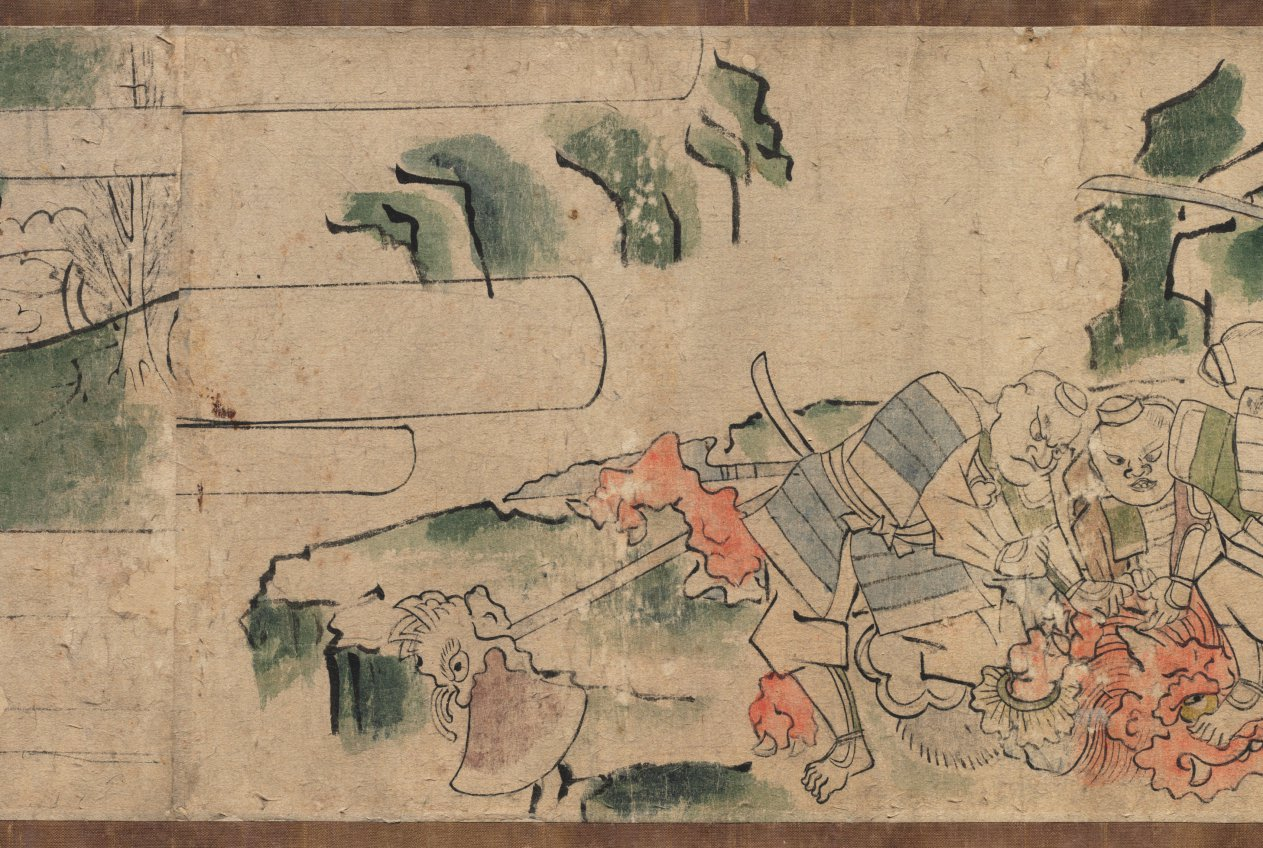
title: Oeyama Engi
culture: Japan, Edo period (1615–1868)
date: 1615–1868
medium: one of a pair of handscrolls; ink and color on paper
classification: Painting